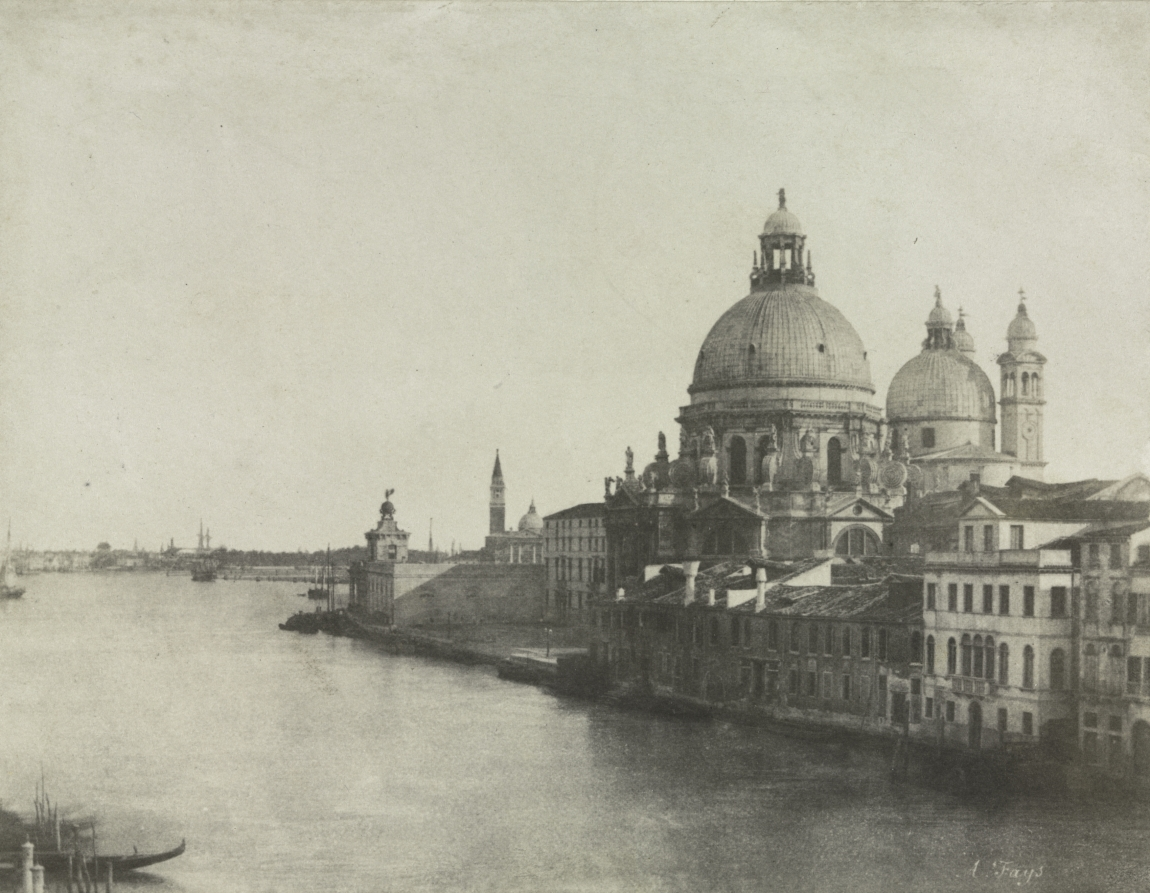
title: Santa Maria della Salute, View of the Grand Canal, Venice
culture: France, 19th century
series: Imprimerie photographique de Lille, Recueil photographique , pl. 19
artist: Baron A. Faÿs (French, active 1850s)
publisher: Blanquart-Évrard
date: 1854 or earlier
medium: salted paper print from waxed paper negative, Blanquart-Évrard process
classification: Photograph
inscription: Written in negative: "A. Fays"; in pencil on recto of mount: "19"; "Santa Maria della Salute, Venice"; J 1074"